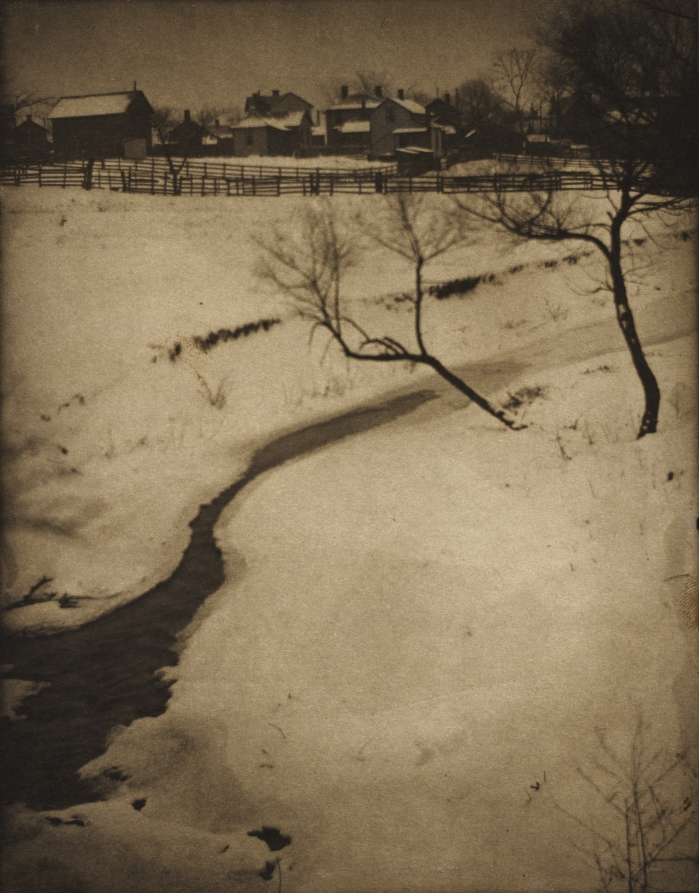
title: Winter Landscape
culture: America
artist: Clarence H. White (American, 1871–1925)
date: c. 1900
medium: platinum print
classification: Photograph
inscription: Written in pencil on verso: "35 [circled]"; "An old / Photograph by / Clarence H. White / 'Moul's Lane' Newark-Ohio / Given to Julia Flory by / Mr. Ralph Steiner- / 1933- / Photograph taken about 1900 ? [? circled]"